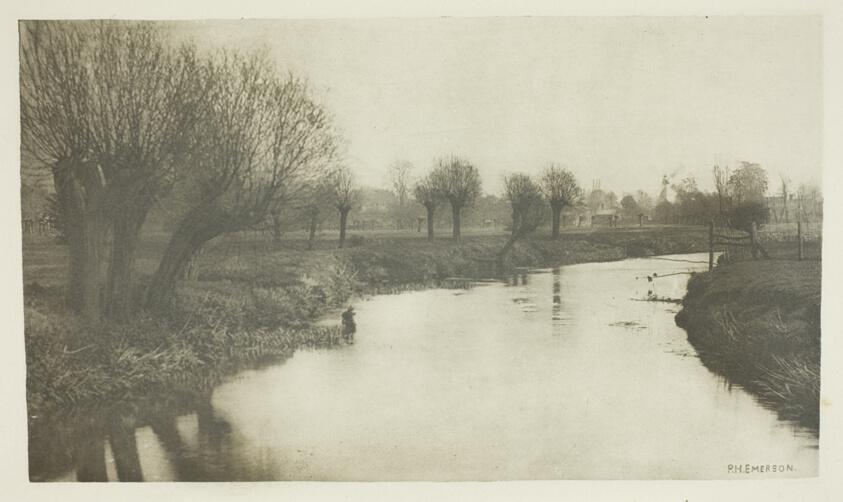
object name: Photograph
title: Stanstead from the Lea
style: 19th century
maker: Peter Henry Emerson (English, born Cuba, 1856–1936)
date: 1880s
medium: Photogravure, plate VIII from the album "The Compleat Angler or the Contemplative Man's Recreation, Volume I" (1888)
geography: England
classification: photogravure; photomechanical process; photography; photograph